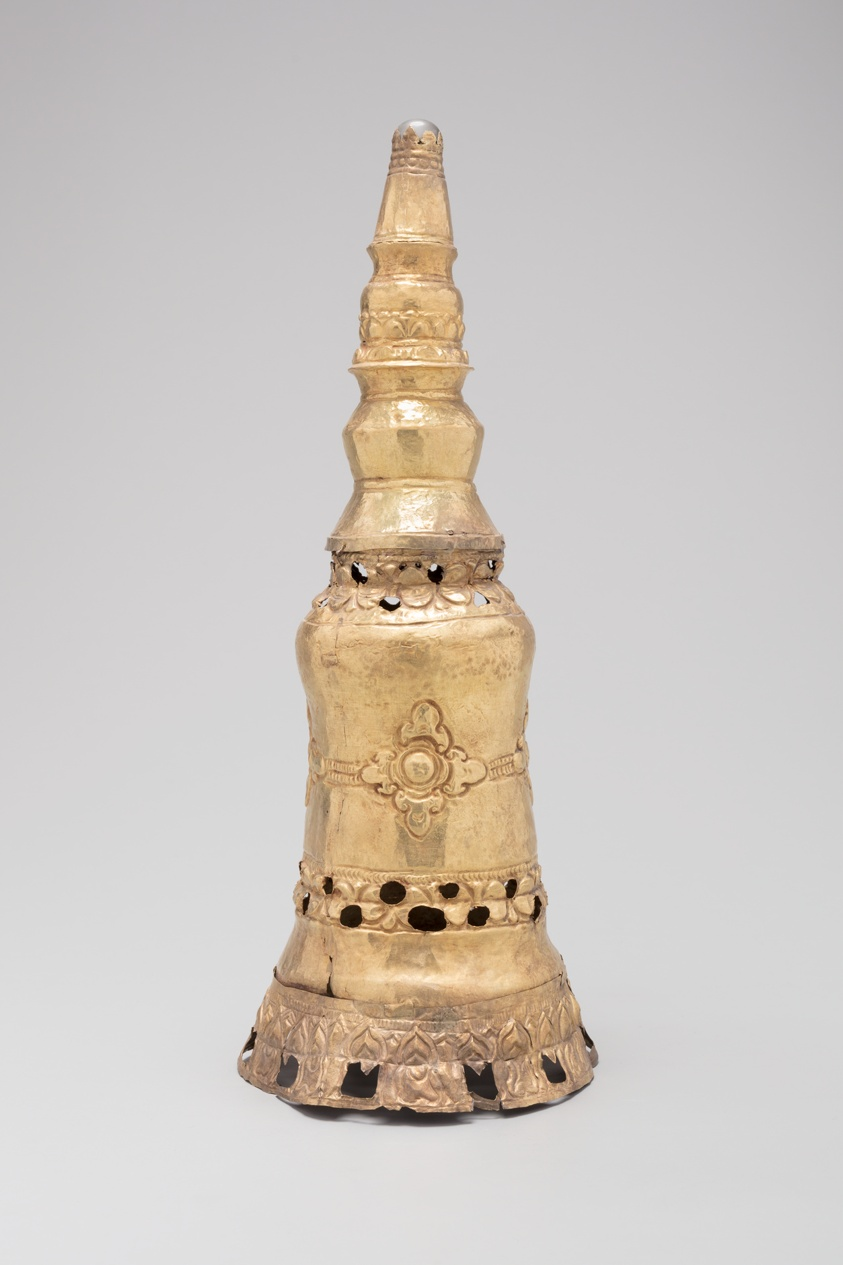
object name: Sculpture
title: Stupa Reliquary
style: Southeast Asian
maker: Burma (Myanmar) or Thailand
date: 9th/10th century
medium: Gold repoussé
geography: Myanmar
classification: reliquary; container; gold; metal; sculpture; asian art